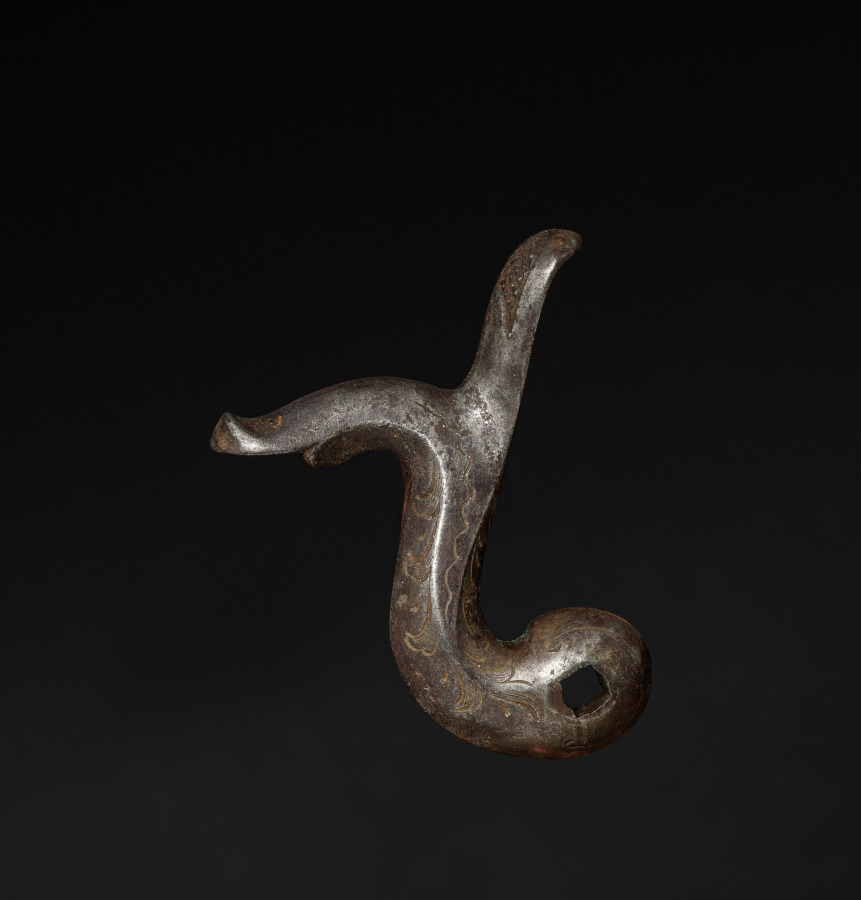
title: Gun-Lock Hammer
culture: England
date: c. 1800–1825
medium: steel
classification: Arms and Armor